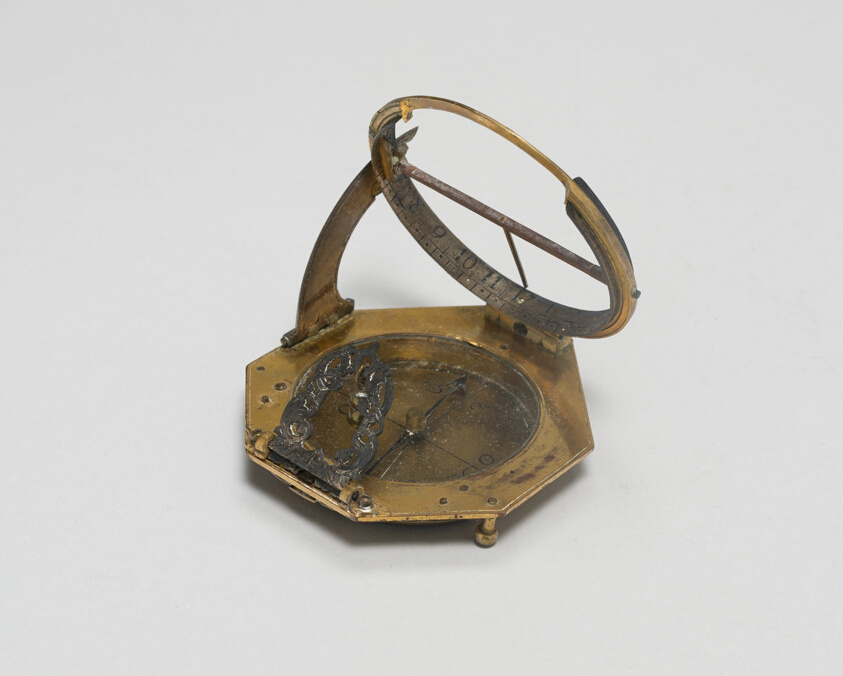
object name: Metalwork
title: Portable Compass Sundial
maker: Germany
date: 17th century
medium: Bronze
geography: Germany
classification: tool; european decorative arts; metalwork